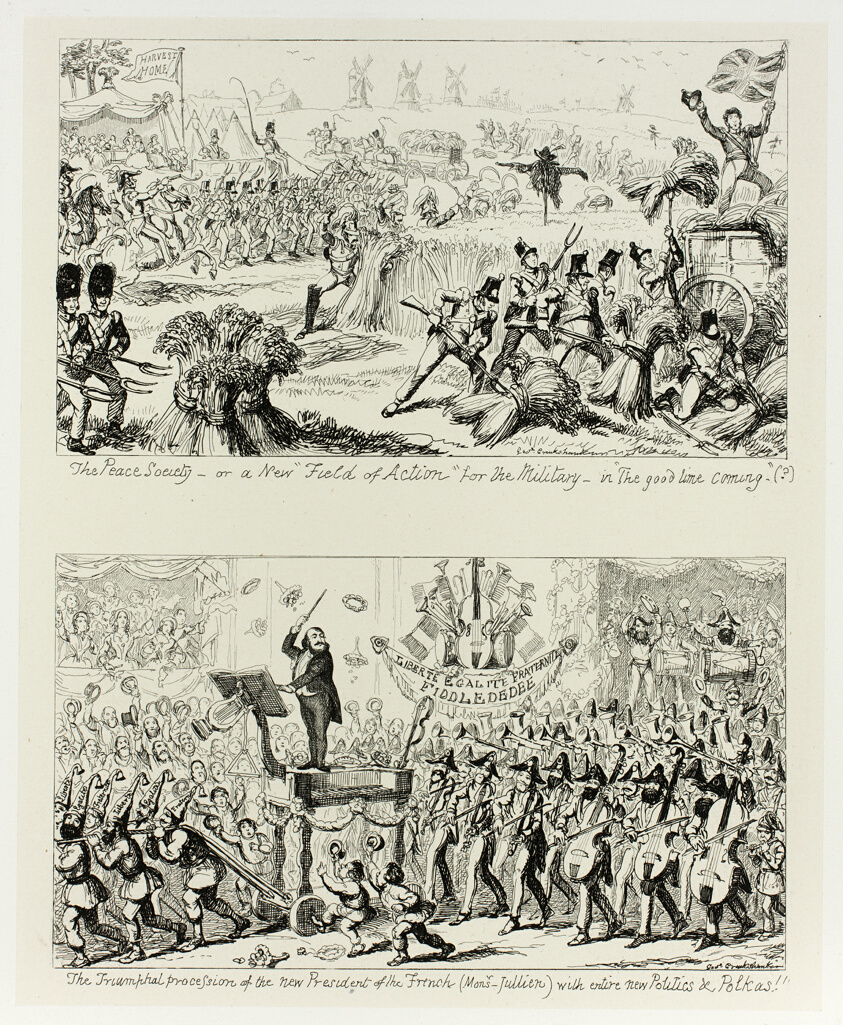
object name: Print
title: The Peace Society, or a New "Field of Action" for the Military - in "The Good Time Coming" from George Cruikshank's Steel Etchings to The Comic Almanacks: 1835-1853 (top)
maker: George Cruikshank (English, 1792-1878); published by Pickering & Chatto (English, 19th century)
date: 1852, printed c. 1880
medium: Two steel etchings in black on cream India paper, laid down on off-white card (chine collé)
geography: England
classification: print; prints and drawing